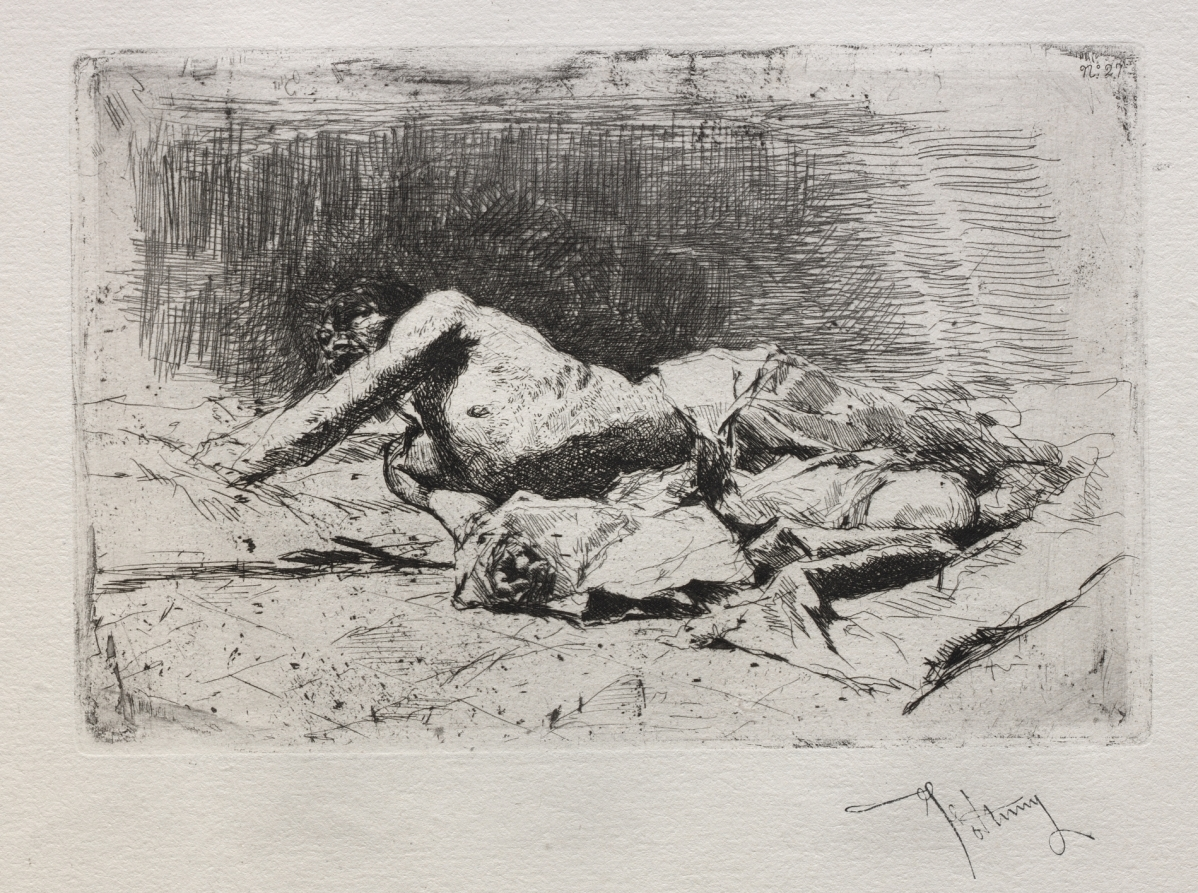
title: Man Rolling on the Ground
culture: Spain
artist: Mariano Fortuny (Spanish, 1838–1874)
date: c. 1860–70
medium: etching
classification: Print